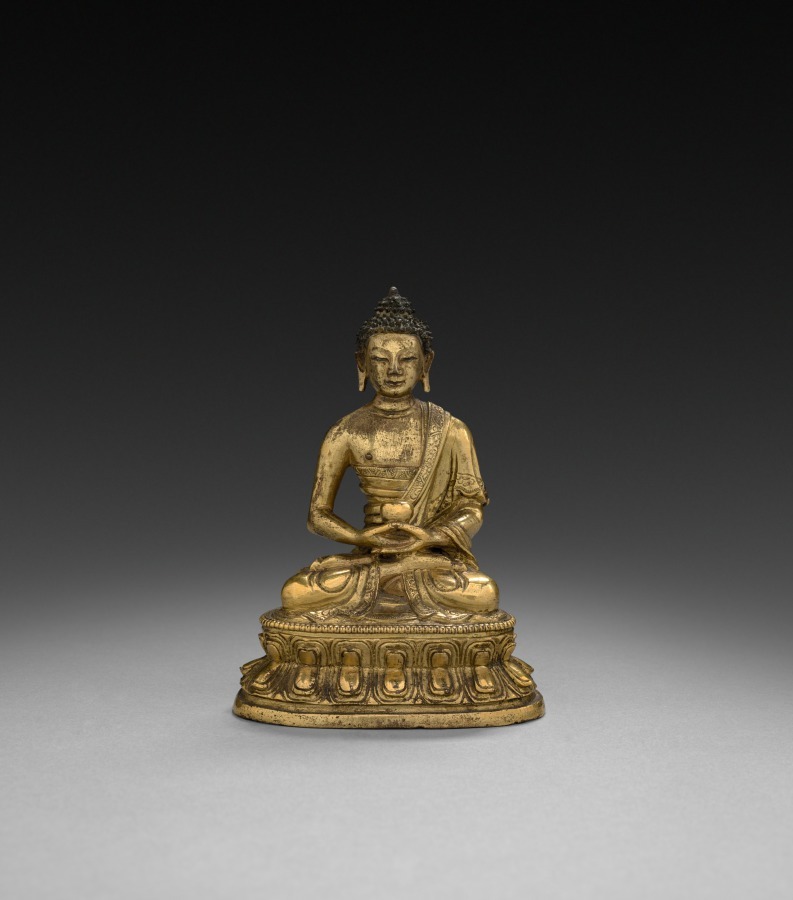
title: Seated Buddha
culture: China, Ming dynasty (1368–1644)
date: 1500s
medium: gilt bronze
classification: Sculpture